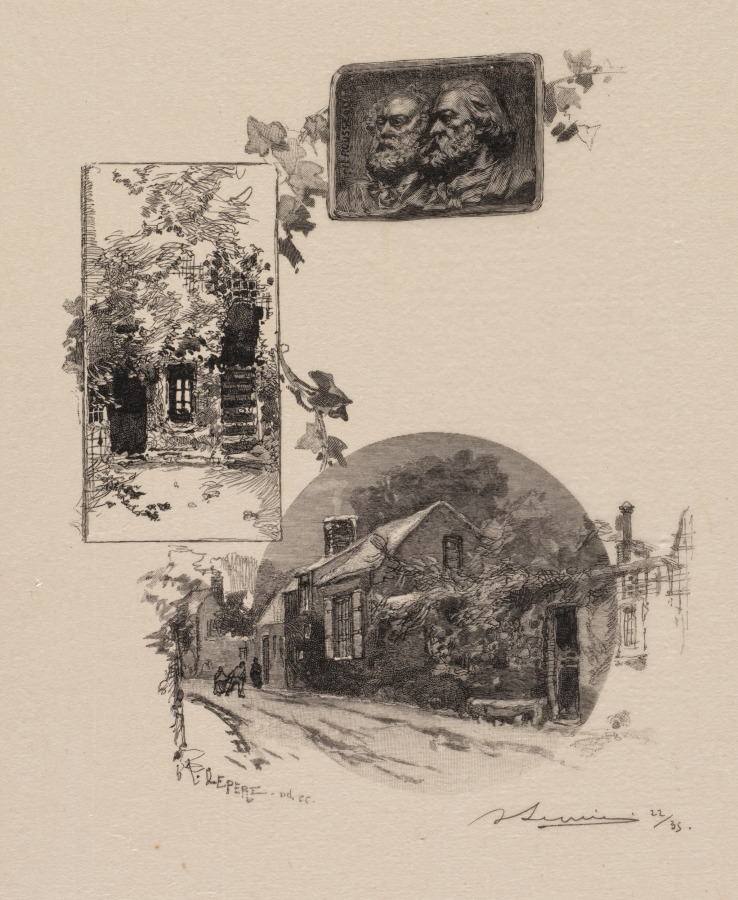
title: Fontainebleau Forest: Entry to Rousseau's Studio and the Millet Home (La Forêt de Fontainebleau: Entrée de l'atelier de Rousseau et maison de Millet)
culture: France, 19th century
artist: Auguste Louis Lepère (French, 1849–1918)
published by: A. Desmoulins, Published in Revue Illustrée, 1887–90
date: 1890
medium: wood engraving from bound volume of 34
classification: Bound Volume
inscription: Below image, lower right, in black ink: ALepère 22/35; in block, lower left: A. LEPÈRE / Del. sc; on window mat, lower right, in graphite: Entrée de l'atelier de Rousseau